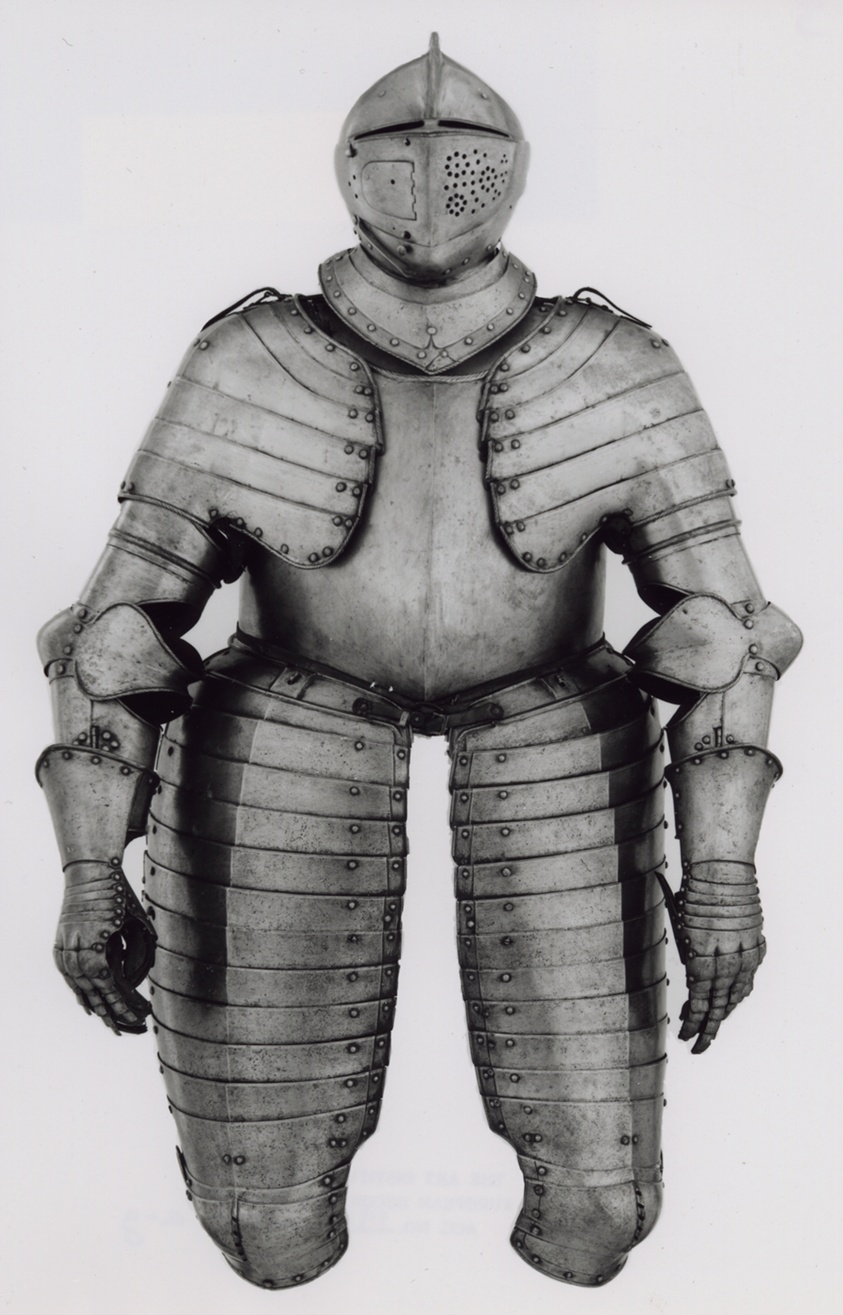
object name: Armor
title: Elements of a Half Armor for Foot Tournament at the Barriers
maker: South German; Augsburg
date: c. 1590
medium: Steel, brass, and leather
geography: Augsburg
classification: suit; armor; arms and armor